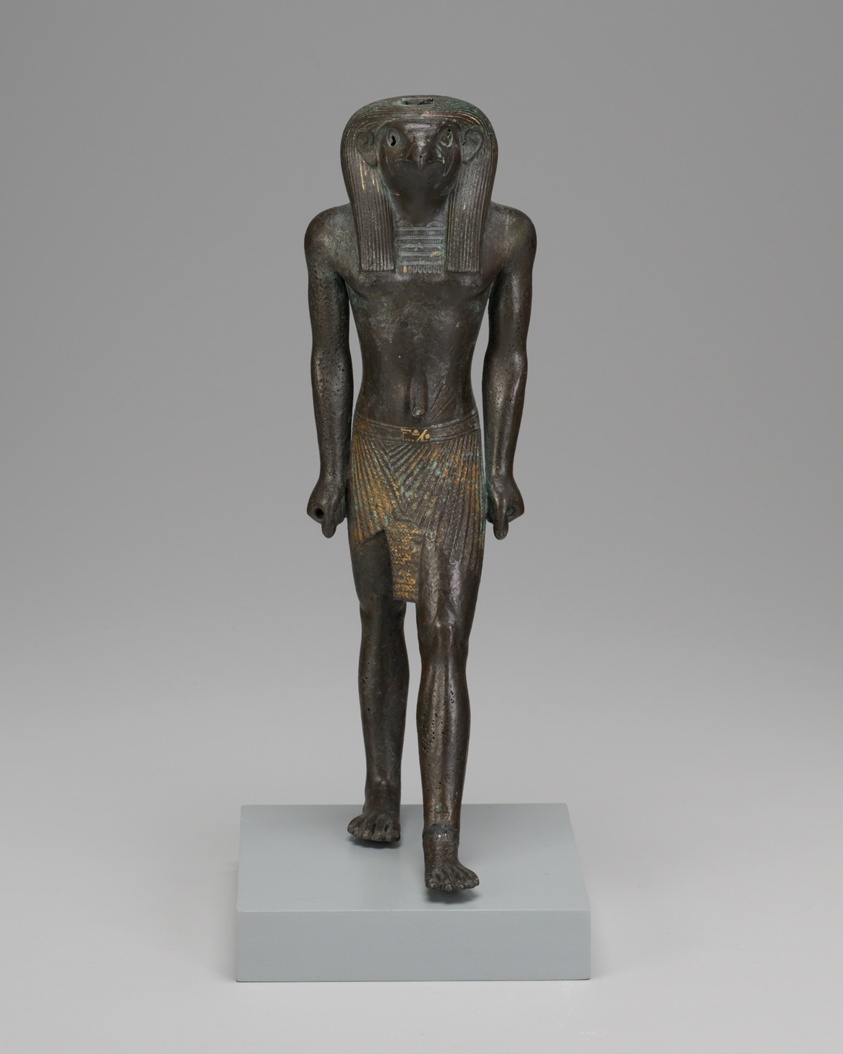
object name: Sculpture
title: Statuette of Re-Horakhty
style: third intermediate period, ancient, egyptian, twenty-fifth dynasty, twenty-first dynasty, twenty-fourth dynasty, twenty-second dynasty, twenty-sixth dynasty, twenty-third dynasty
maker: Egyptian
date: Third Intermediate Period-Late Period, Dynasty 21–26, about 1069–525 BCE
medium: Copper alloy with gilding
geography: Egypt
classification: statuette; bronze; metal; sculpture; ancient art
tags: gods (deities), birds, men, suns, Hieroglyphs, falcons